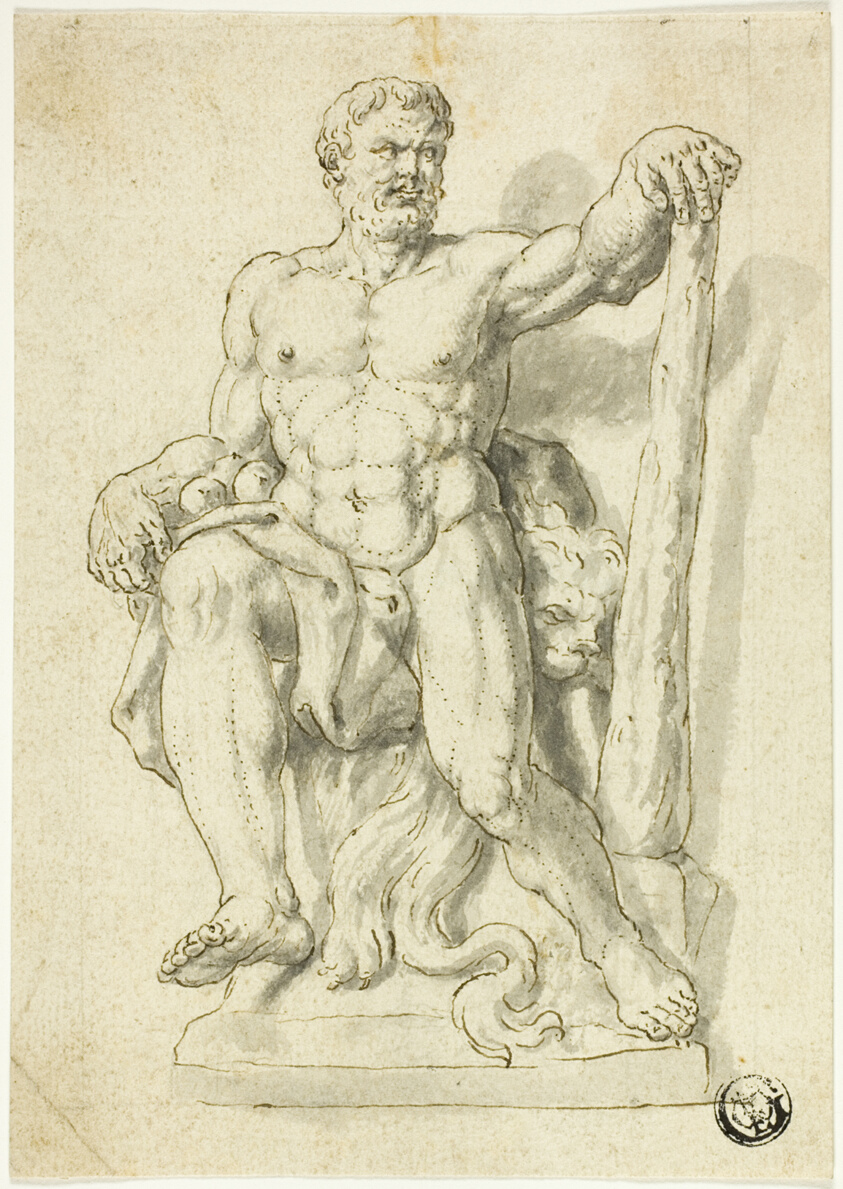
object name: Drawing and Watercolor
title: Statue of Seated Hercules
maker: Style of Raymond de Lafage (French, 1656-1690)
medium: Pen and brown ink, with brush and gray wash, with traces of graphite, on cream laid paper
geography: France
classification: pen and ink drawings; drawings (visual works); prints and drawing